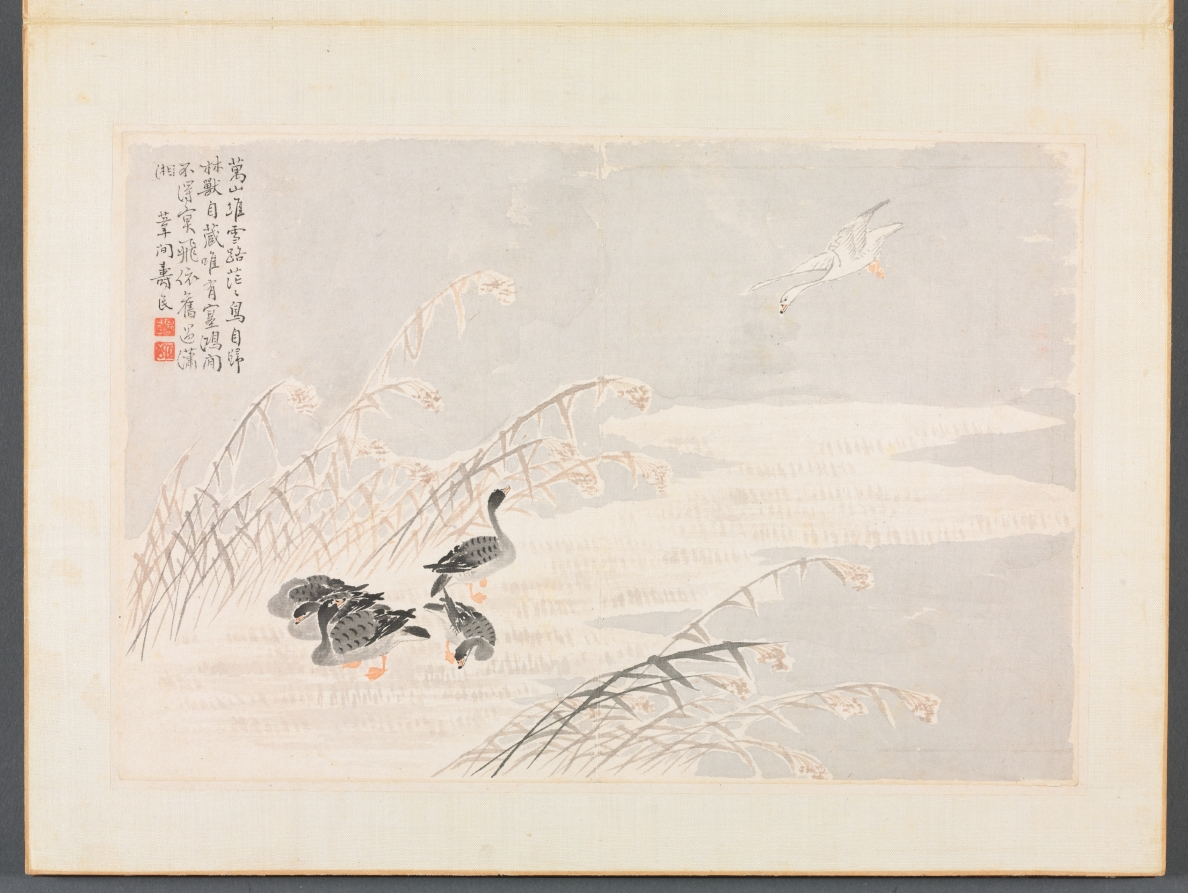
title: Album of Calligraphy and Paintings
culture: China, Qing dynasty (1644-1911)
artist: Bian Shoumin (Chinese, 1684–1752)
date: first half of the 1700s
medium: album leaf; ink and color on paper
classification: Painting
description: The artist Bian Shoumin is known for his depiction of wild geese, water, and reeds. The migrant birds in autumn and winter evoked, in the minds of the Chinese intelligentsia, a time of parting and sorrow.